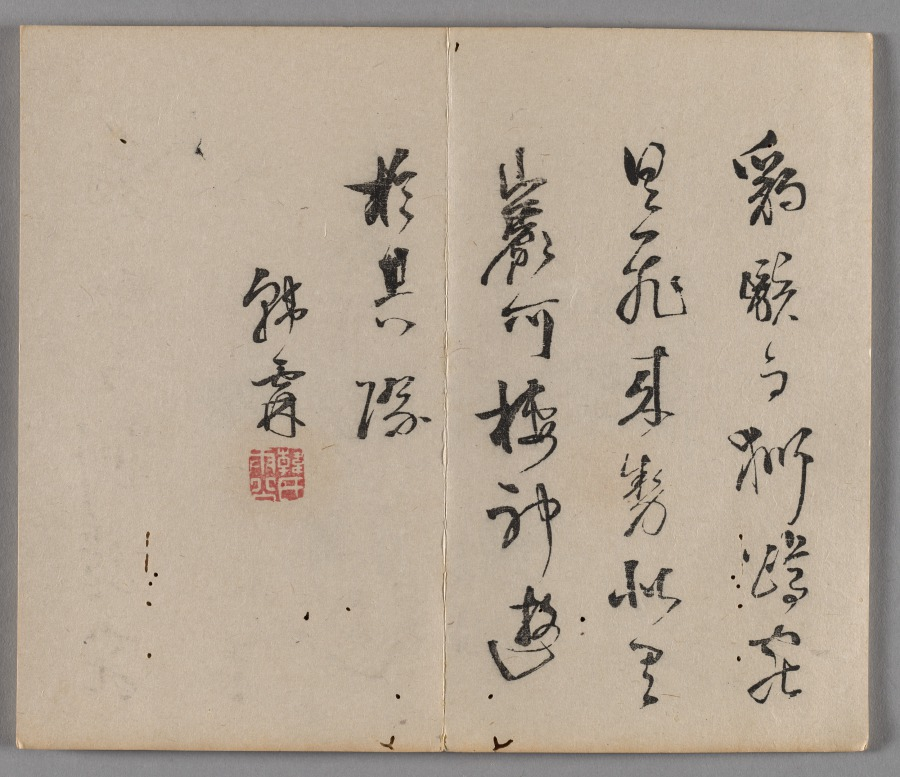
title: Ten Bamboo Studio Painting and Calligraphy Handbook (Shizhuzhai shuhua pu): Rocks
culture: China, Qing dynasty (1644-1911)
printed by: Hu Zhengyan (Chinese, c. 1584–1674)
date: 1633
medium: Woodblock-printed book; ink and colors on paper; first edition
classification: Print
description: Color printing reached a level of perfection in the early 1600s, as seen in this Ten Bamboo Studio Collection of Calligraphy and Painting and the Mustard Seed Garden Manual of Painting (printed 1679 and 1701). The painterly quality, precision in registering (aligning) the woodblocks, and harmonious colors made them the most successful color print editions in Chinese history. Both editions were printed and compiled in Nanjing, spread nationwide, and had a great impact on the arts in Japan and Korea.